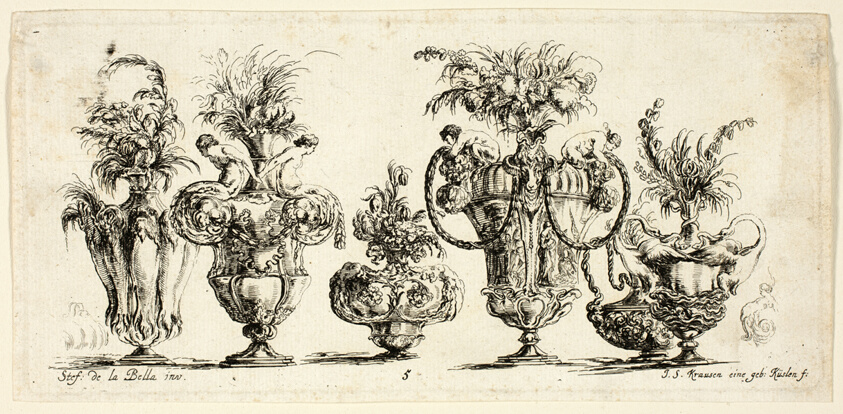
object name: Print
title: Plate Five from Raccolta di Vasi diversi di Stef. de la Bella Fiorentino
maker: Johanna Sibylla Küsel (German, active late 17th-early 18th century); after Stefano della Bella (Italian, 1610-1664)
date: 1646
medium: Etching on paper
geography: Germany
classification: etching; print; prints and drawing